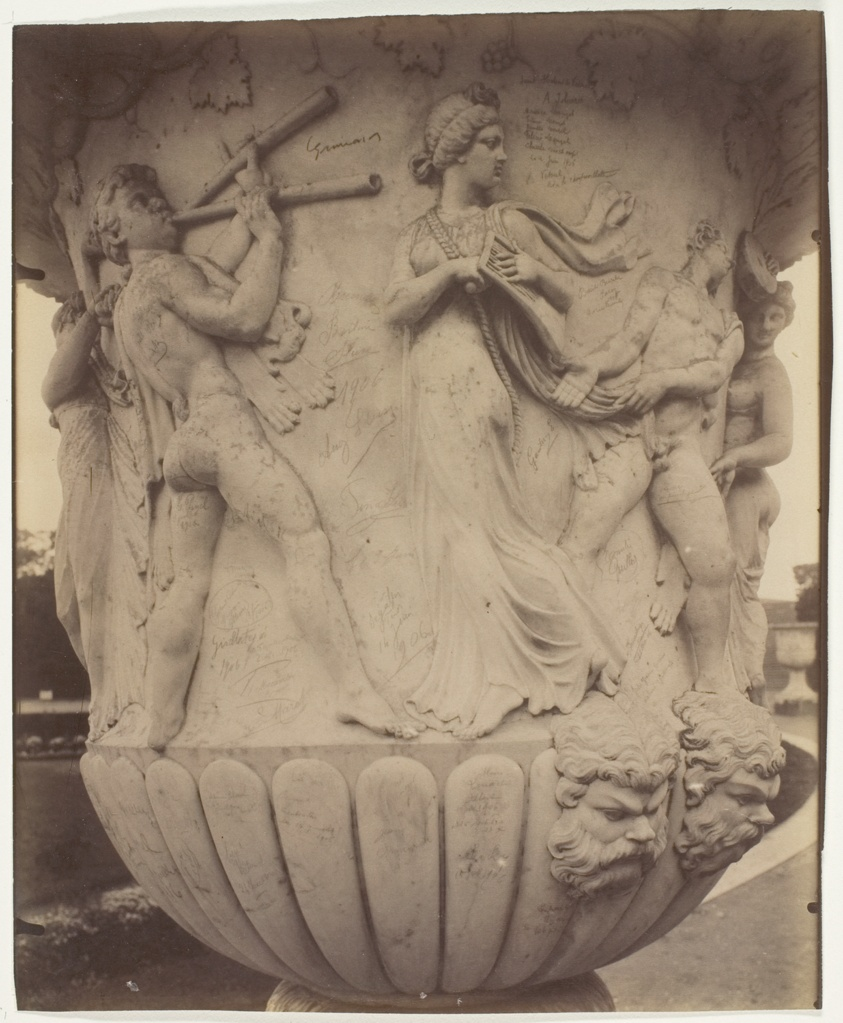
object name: Photograph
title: Versailles, Vase (Detail)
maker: Jean-Eugène-Auguste Atget (French, 1857–1927)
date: 1906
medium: Albumen print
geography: France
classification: albumen silver print; photographic process; photography; photograph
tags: Collected by Hugh Edwards